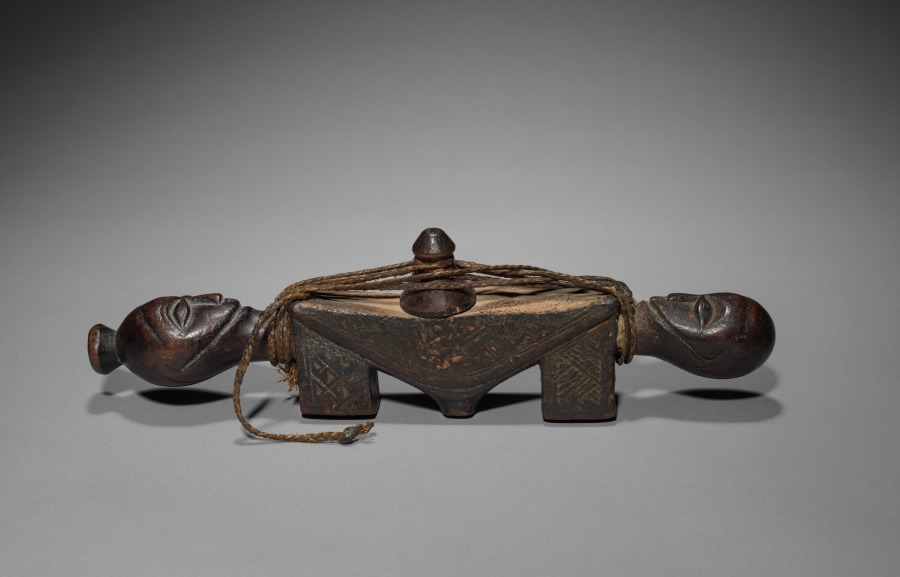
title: Divination Implement (itombwa)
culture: Africa, Central Africa, Democratic Republic of the Congo, Kuba-style maker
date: 1890–1910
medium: Wood and plant fiber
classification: Sculpture